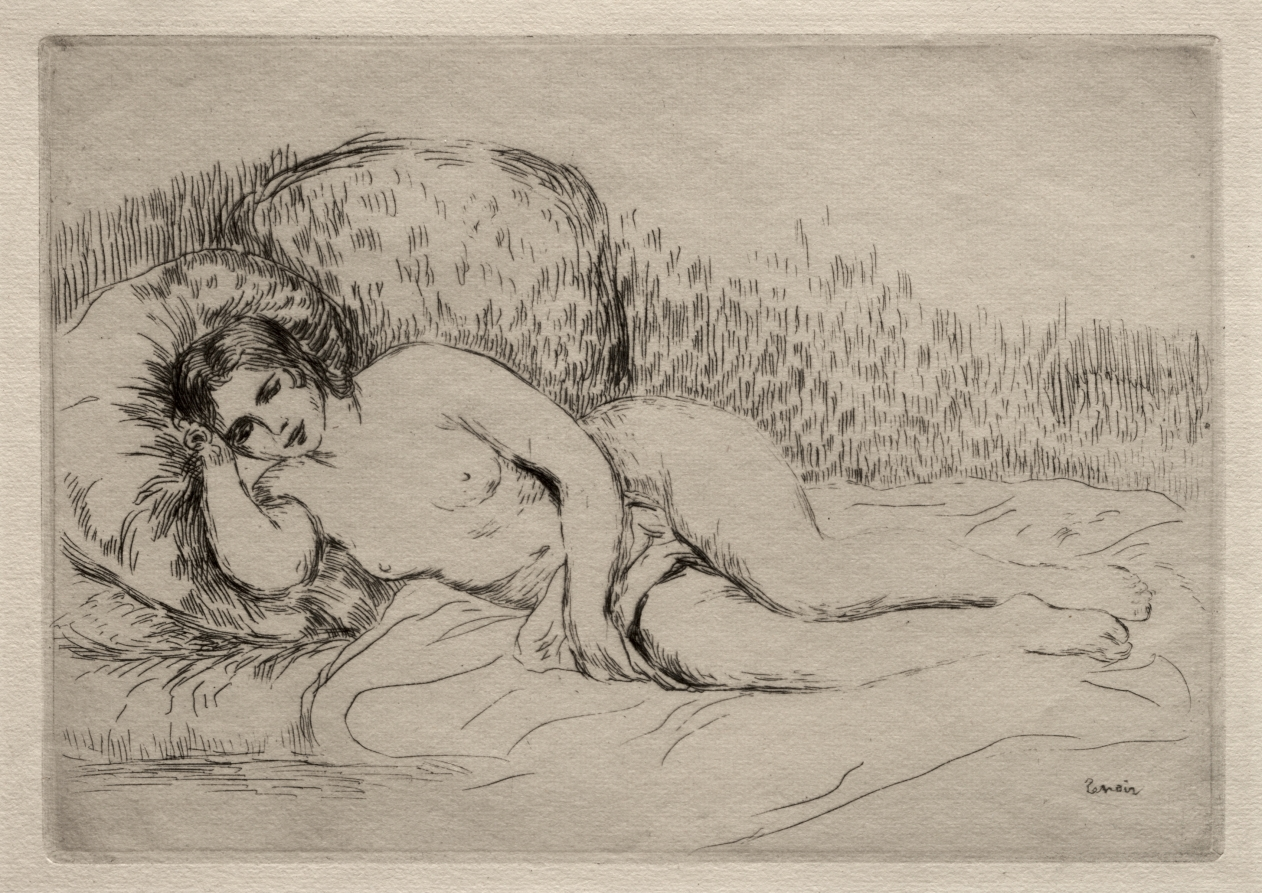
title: Nude Woman Reclining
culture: France, late 19th-early 20th century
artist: Pierre-Auguste Renoir (French, 1841–1919)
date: 1906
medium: etching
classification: Print